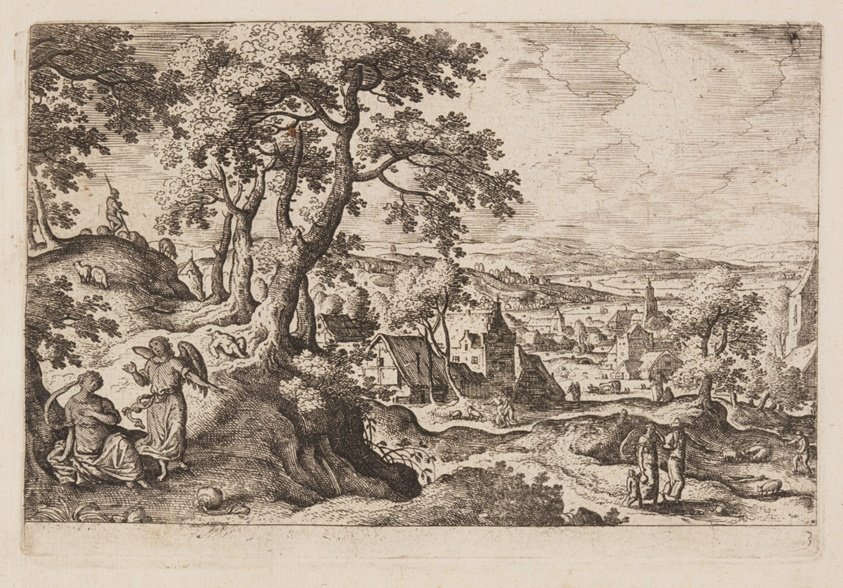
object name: Print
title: Plate 3, from Landscapes with Scenes from the Old and New Testament and Ovid’s Metamorphoses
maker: Hans Bol (Flemish, 1534–1593); published by Philip Galle (Flemish, 1537–1612)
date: 1574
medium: Etching on ivory laid paper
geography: Flanders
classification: print; paper; prints and drawing; etching